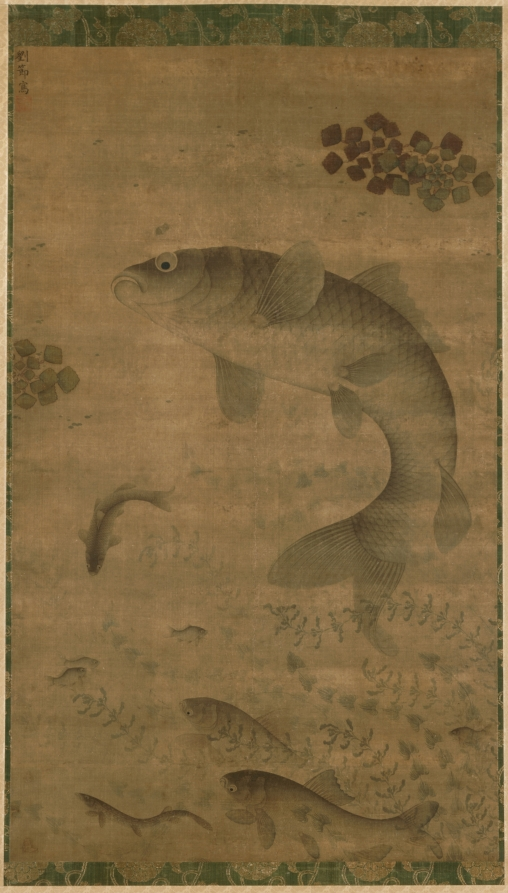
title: Leaping Carp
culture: China, Ming dynasty (1368–1644)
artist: Liu Jie (Chinese, c. 1447–1520s)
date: 1368–1644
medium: hanging scroll, ink and color on silk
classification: Painting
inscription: Artist's signature and seal: Written by Liu Jie 劉節寫. [seal] Chin-i-chih-hui chih chang.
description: With a fine ink line and graded wash, the life-like depiction of these swiftly moving carp is representative of the high quality of works by Liu Jie, a Ming dynasty court painter known for his fish paintings. The artist’s signature and seal are in the painting’s top left corner. The carp is an auspicious and popular subject in Chinese painting. Here, the leaping carp can be associated with “a carp jumping the dragon gate,” which according to mythology transforms into a dragon, emblematic of a scholar’s success in passing the civil service examinations. Another reading suggests that this carp is not leaping but guiding his offspring in worshipping heaven.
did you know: The clusters of geometric leaves painted with mineral pigments are likely water caltrap.